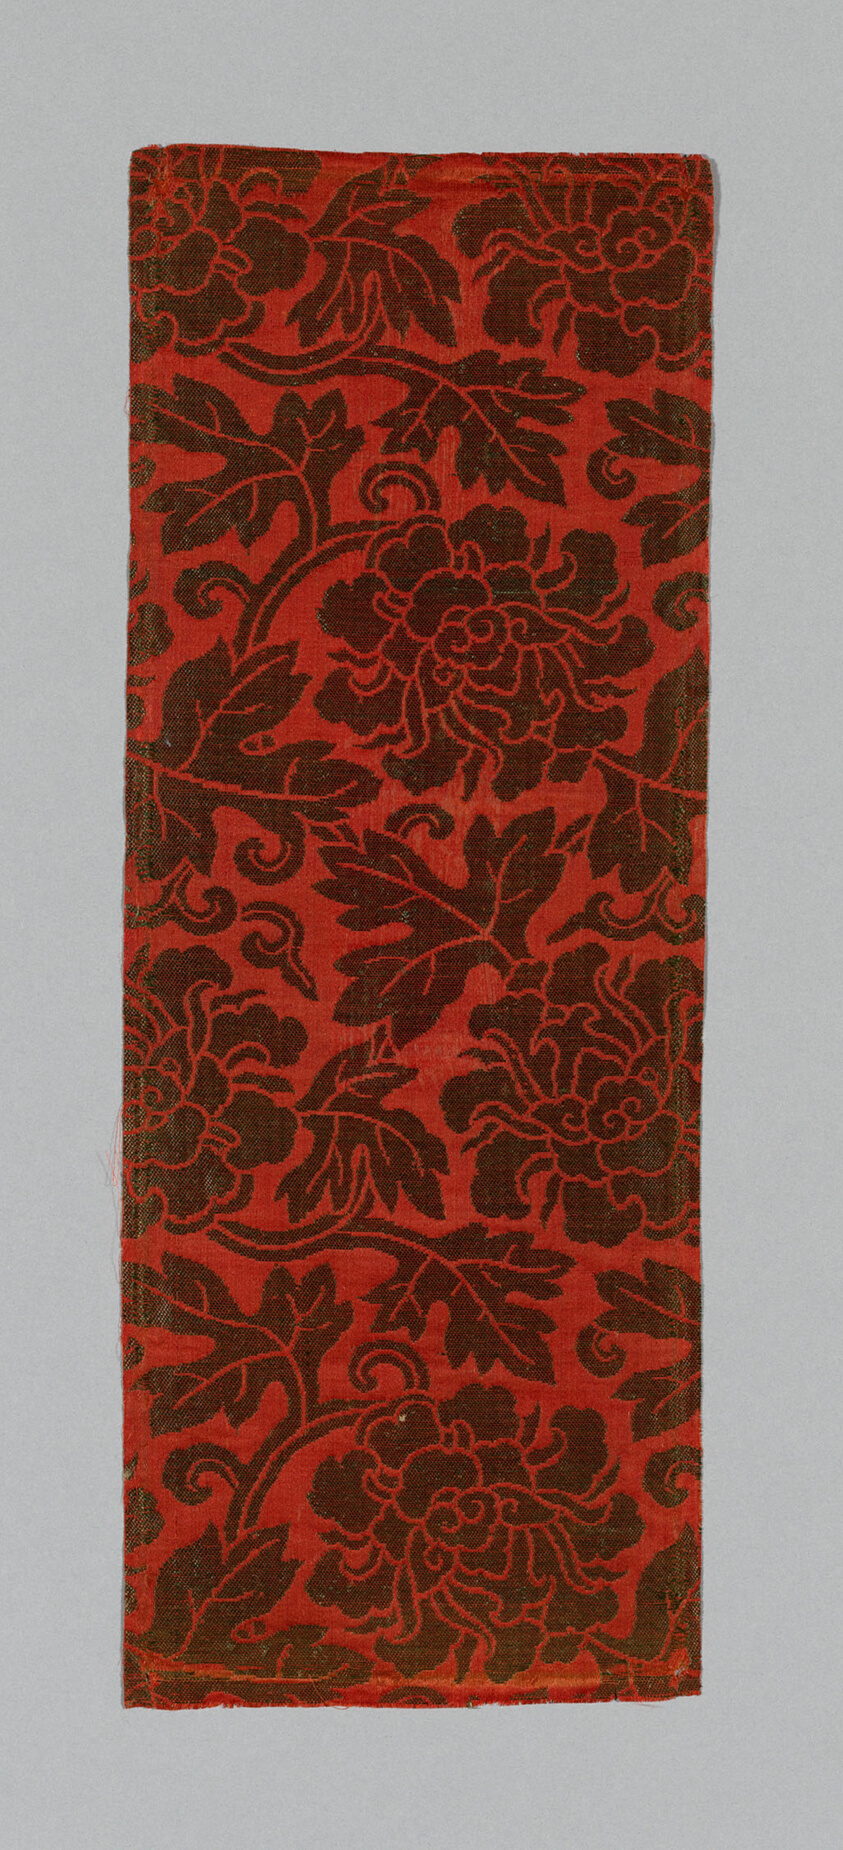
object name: Textile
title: Sutra Cover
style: ming, Chinese (culture or style), East Asian, asian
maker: China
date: Ming dynasty (1368–1644), c. 1590's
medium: Silk, warp-float faced 4:1 satin weave with supplementary patterning wefts bound in weft-float faced 1:4 satin interlacings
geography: China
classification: textile; weaving